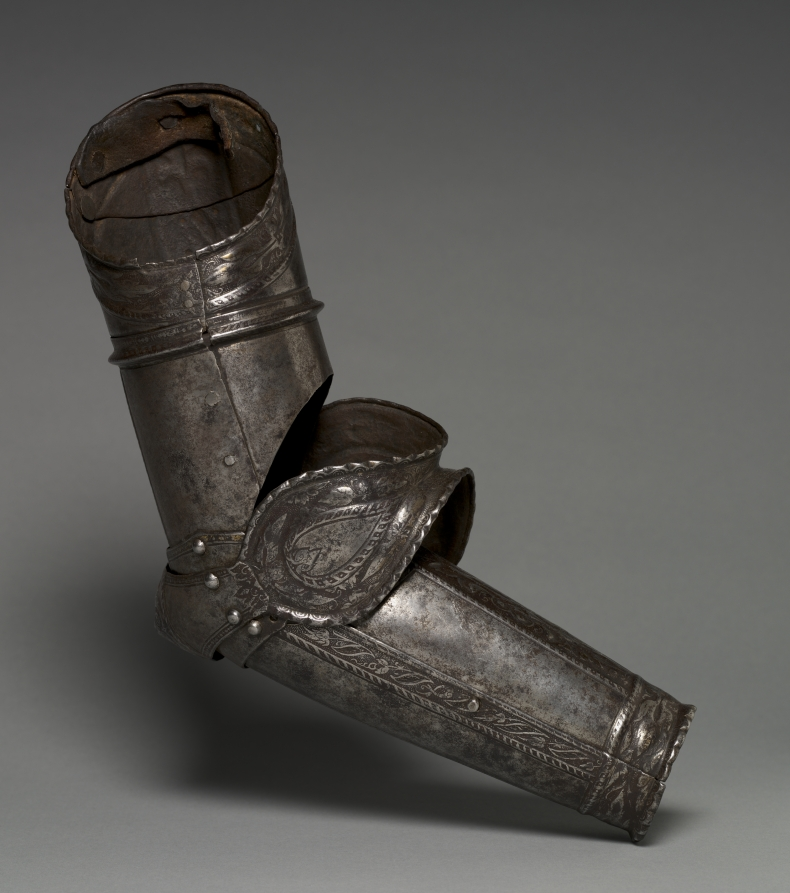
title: Left Arm Elements from a Boy's Armor (Lower Cannon, Couter, Rerebrace)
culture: Germany, Augsburg, mostly 17th Century (some modern)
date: c. 1560 (some modern)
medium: etched and lightly embossed steel with traces of gilding, leather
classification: Arms and Armor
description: These elements once belonged to a full suit of armor that would have been made for a young boy. Decorated with etching, embossing, and gilding, the original suit would have been impressive. Dressing your sons in small custom suits of armor was popular with the wealthiest nobles. They would have been worn for parades and ceremonial occasions and once outgrown were often kept as mementos. Made for the left arm, the rerebrace or upper cannon protected the upper arm, the couter the elbow, and the lower cannon the forearm.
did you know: Small-scale suits of armor would help prepare a young boy for knighthood.